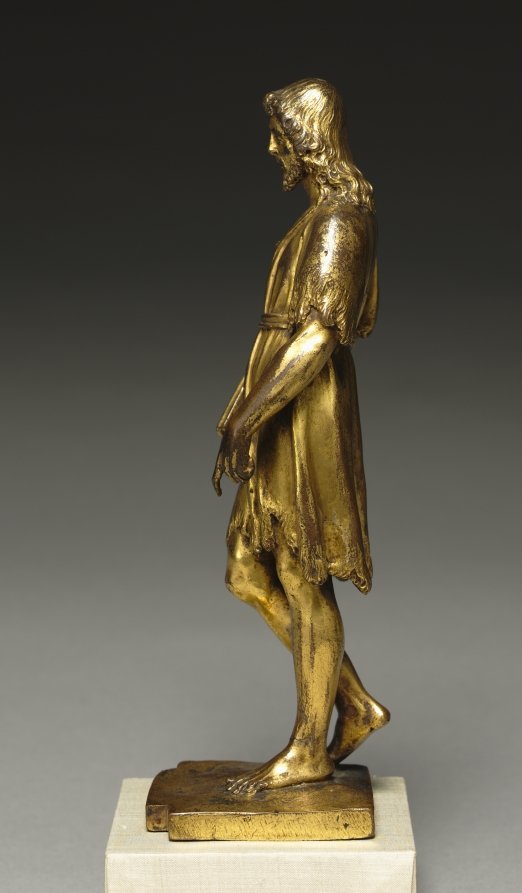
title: Saint John the Baptist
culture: Italy, Venice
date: c. 1550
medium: gilt bronze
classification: Sculpture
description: This small bronze, covered with gold, was produced in multiple versions. Saint John stands here, looking calm and composed, in a rather graceful pose. This piece has a sense of forward motion even though the figure appears to be leaning back in this stance. Elegant and subtle, this piece is a beautiful example of small cast Renaissance bronzes.